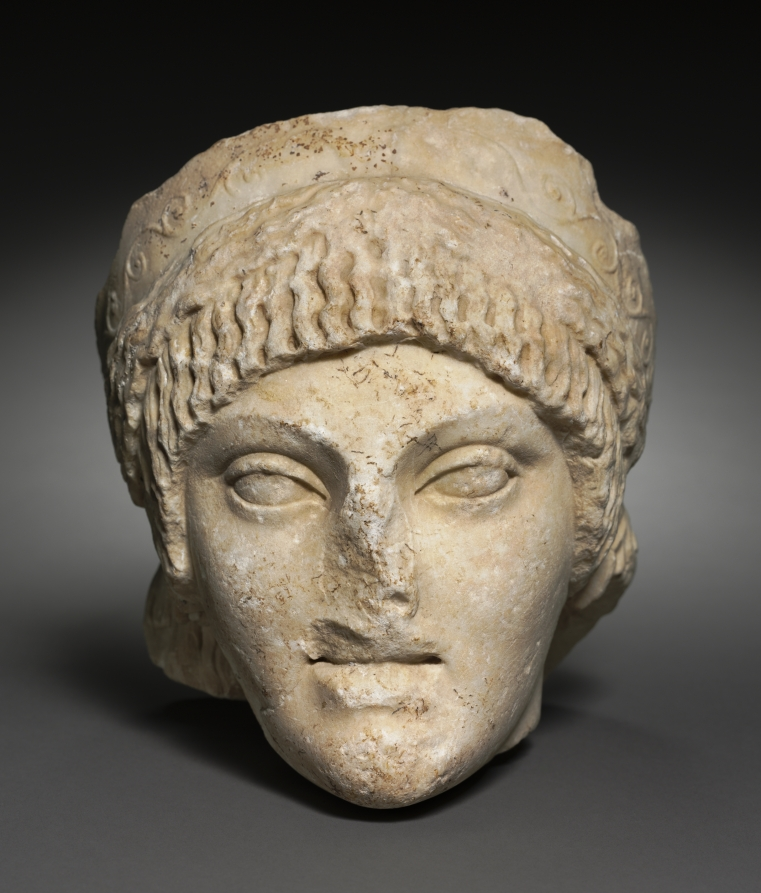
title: Head of a Young Woman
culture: Italy, Roman (archaizing)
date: 25–1 BCE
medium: marble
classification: Sculpture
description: This head of a young woman is designed after Greek art in the Archaic period (c. 600–480 BCE). She references a type of Greek statue called a kore in her heavily patterned hair, almond-shaped eyes, neutral expression, and large disk earrings, best preserved on the right ear. Her stephane or diadem crown is from the later Hellenistic period; however, with the addition of the decorative vegetal scroll it is characteristic of Roman art. All these elements together are not found in original Greek archaic artworks. This ancient combination of deliberately historic styles is called archaizing or archaistic by modern scholars.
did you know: When Rome conquered Greece in 146 BCE, Romans developed a taste for historic Greek art.